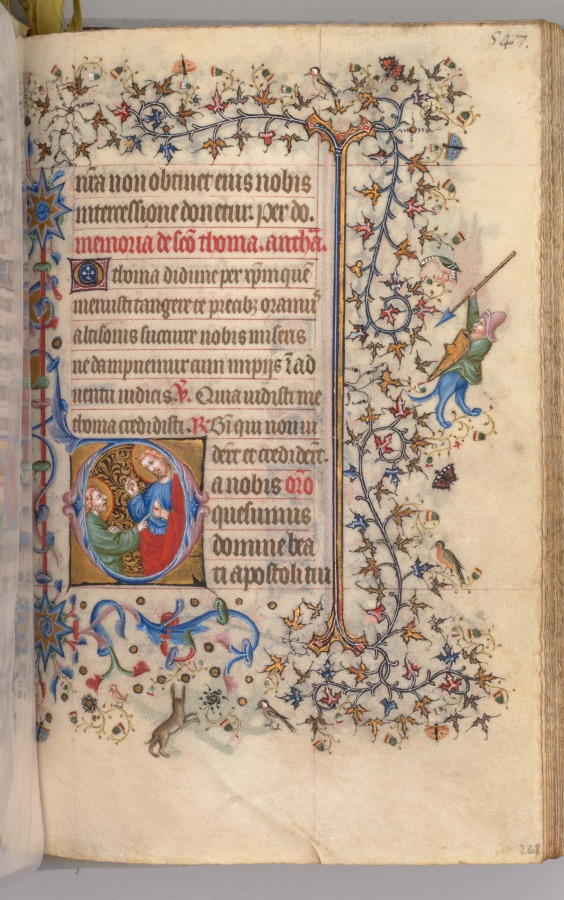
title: Hours of Charles the Noble, King of Navarre (1361-1425): fol. 268r, St. Thomas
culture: France, Paris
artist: Master of the Brussels Initials and Associates (French)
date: c. 1405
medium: ink, tempera, and gold on vellum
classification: Bound Volume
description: This precious volume was obviously highly prized by its owner, the French-born King of Navarre, who had his coat of arms painted on no less than twenty folios. Rather than directly commissioning this manuscript from a specific workshop, it seems that Charles the Noble acquired his book of hours -- perhaps ready-made for the luxury market -- while on a trip to Paris in 1404-05. A collaborative effort, six painting styles are evidenced within the pages of this codex, those of two Italians, two Frenchmen, and two Netherlanders. The painter who was responsible for the planning and decoration of the book, and who produced seventeen of the large miniatures, was a Bolognese artist known as the Master of the Brussels Initials. His principal assistant, responsible for most of the borders, was a Florentine who signed his name "Zecho" da Firenze on folio 208 verso.